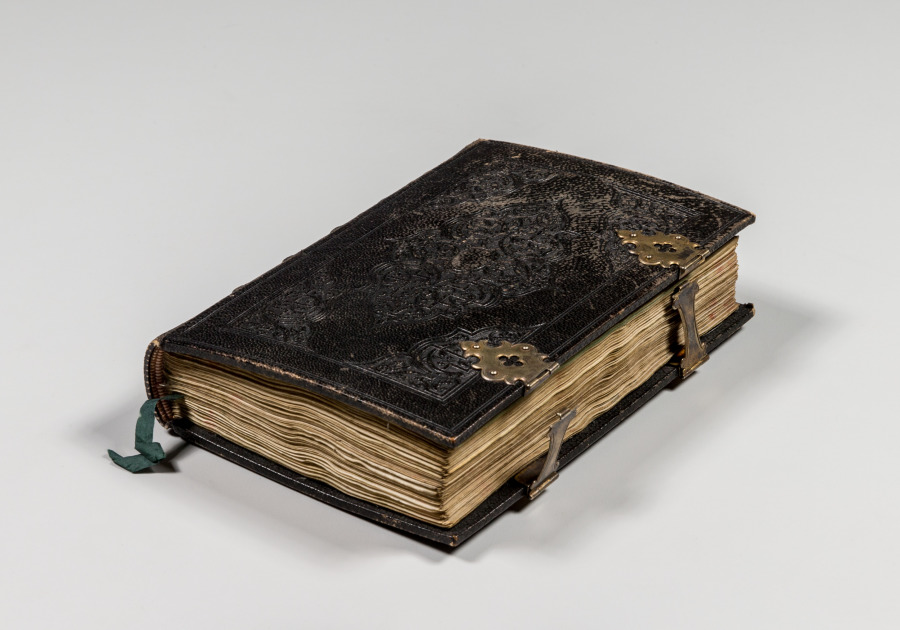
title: Book of Hours (Use of Paris)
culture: France, Paris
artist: possibly studio or workshop of The Bedford Master (French, Paris, active c. 1405–30)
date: c. 1420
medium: ink, tempera, and gold on vellum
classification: Bound Volume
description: The identity of the Bedford Master is not known. He is named for his work on two books produced for John of Lancaster, 1st Duke of Bedford, between 1415 and 1435. He was active in Paris and known to have been the head of a large and prolific workshop. The illuminator, one of the most innovative artists of his time, based his style on trends of the period around 1400.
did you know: Books of hours were the most abundantly produced book in the Middle Ages.